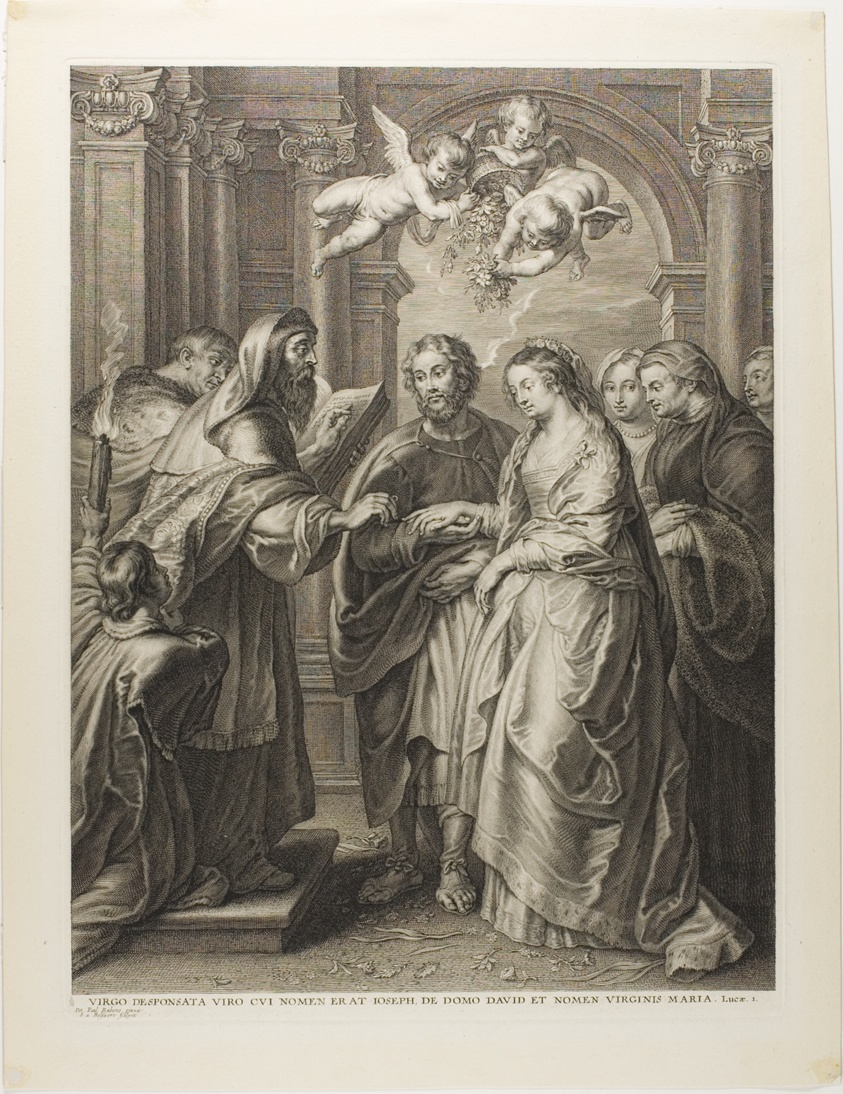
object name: Print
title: The Marriage of the Virgin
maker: Schelte Adamsz. Bolswert (Dutch, active in Flanders, c. 1586–1659); after Peter Paul Rubens (Flemish, 1577-1640)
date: 1625/59, printed after 1750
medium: Engraving in black on ivory wove paper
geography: Netherlands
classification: engraving; print; prints and drawing